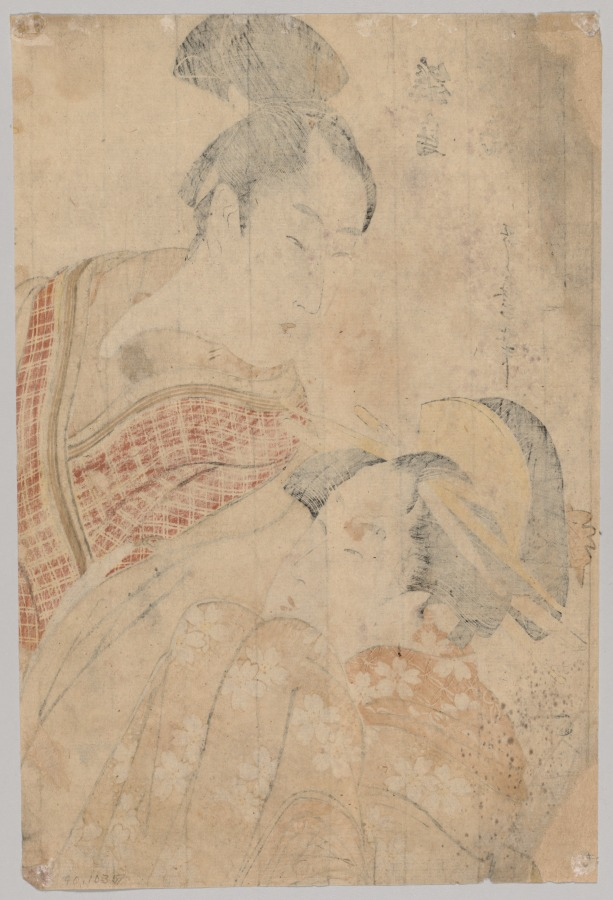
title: Making Love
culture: Japan, Edo period (1615–1868)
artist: Kitagawa Utamaro (Japanese, c. 1754–1806)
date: 1753–1806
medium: color woodblock print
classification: Print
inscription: Signature: Utamaro fude